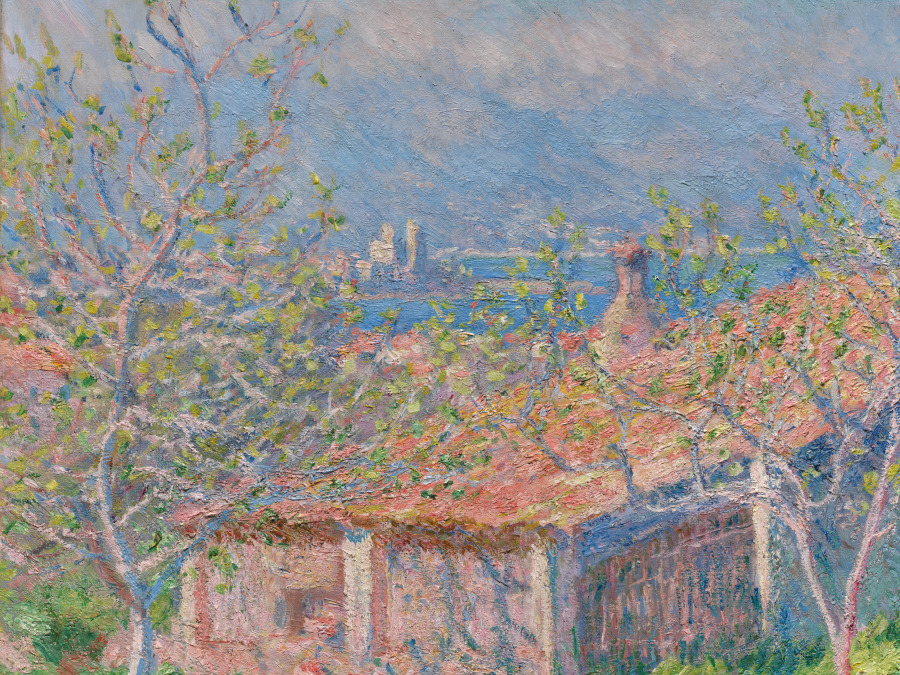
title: Gardener's House at Antibes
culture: France, 19th century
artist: Claude Monet (French, 1840–1926)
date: 1888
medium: oil on fabric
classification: Painting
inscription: Signed lower right: Claude Monet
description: In 1888, Claude Monet spent four months in Antibes, a city in southeastern France on the Mediterranean coast, to derive inspiration for painting. Although his visit was occasionally challenged by strong winds that threatened to knock over his easel, the artist was able to complete nearly 40 works. This especially vibrant canvas is a depiction of a gardener’s house set against the sea and the distant Alps. Monet portrays intense midday light through thickly applied paint in bright colors that evoke the region’s sun-drenched climate. Small daubs of green on the slender trees framing the house suggest the onset of spring.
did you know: Monet painted 35 canvases during his visit to Antibes from January to May 1888.